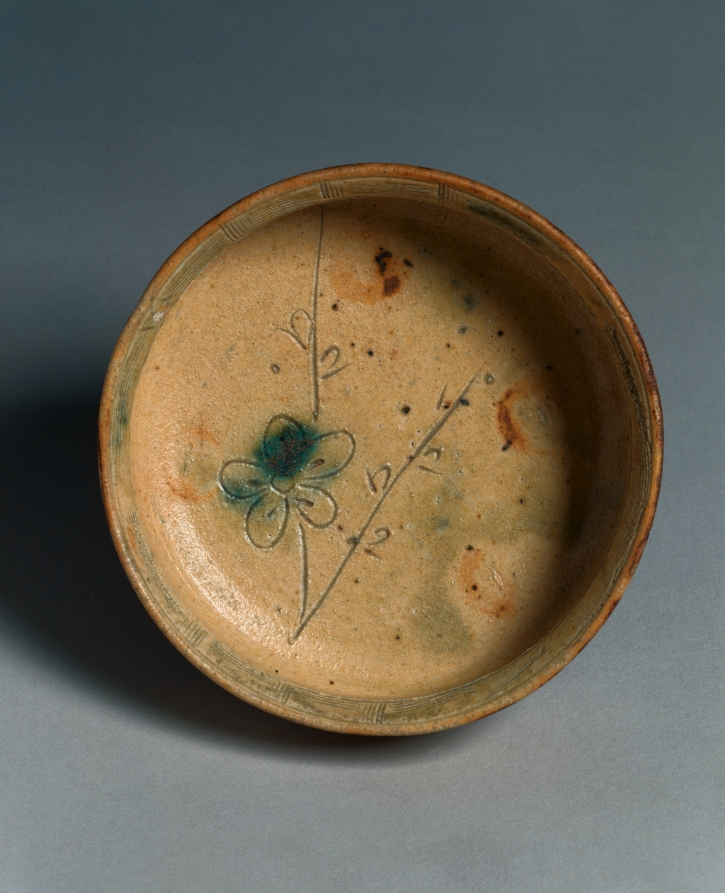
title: Bowl: Yellow Seto Ware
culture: Japan, Momoyama period (1573–1615)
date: c. 1590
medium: glazed stoneware with incised decoration (Seto ware)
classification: Ceramic